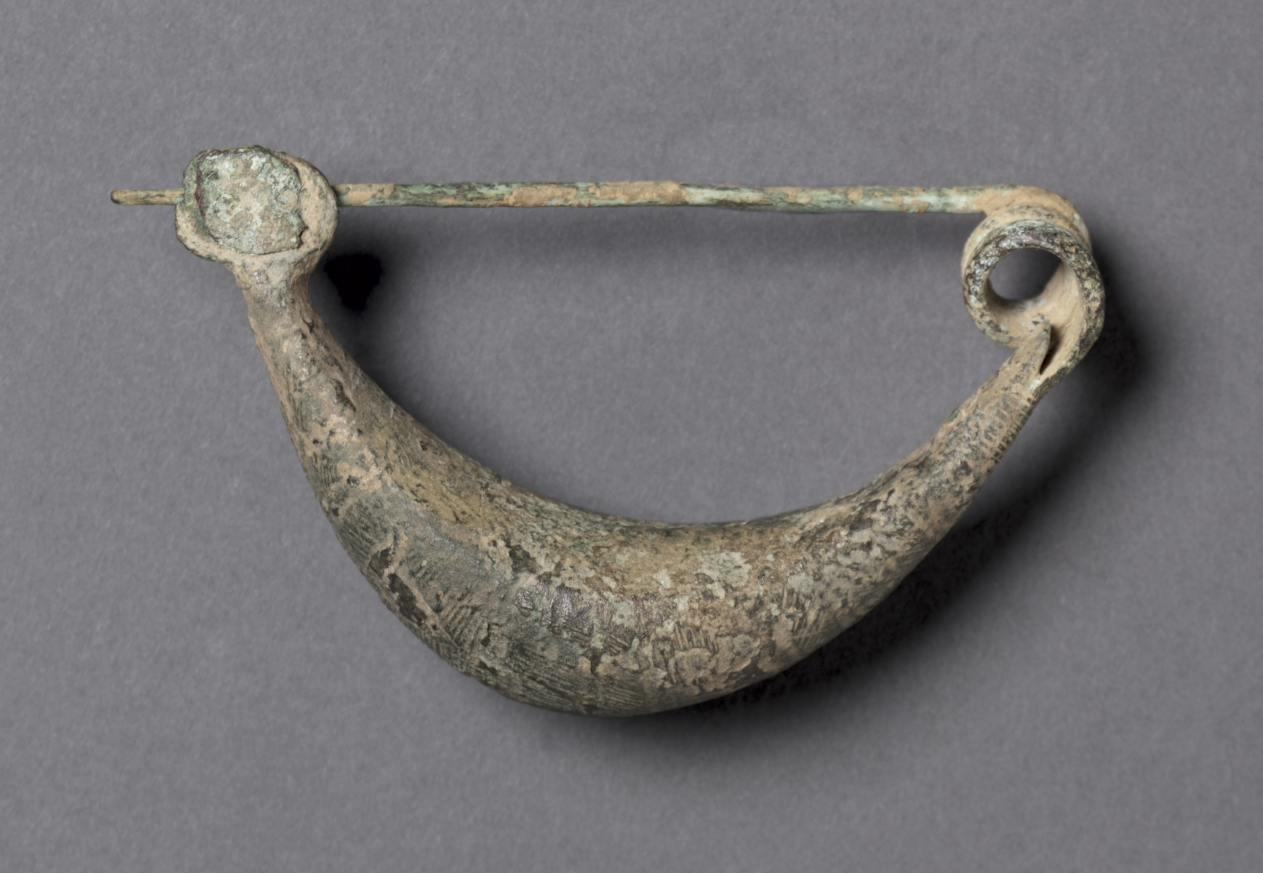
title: Boat-Shaped Fibula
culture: Etruscan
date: 900–700 BCE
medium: bronze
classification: Jewelry